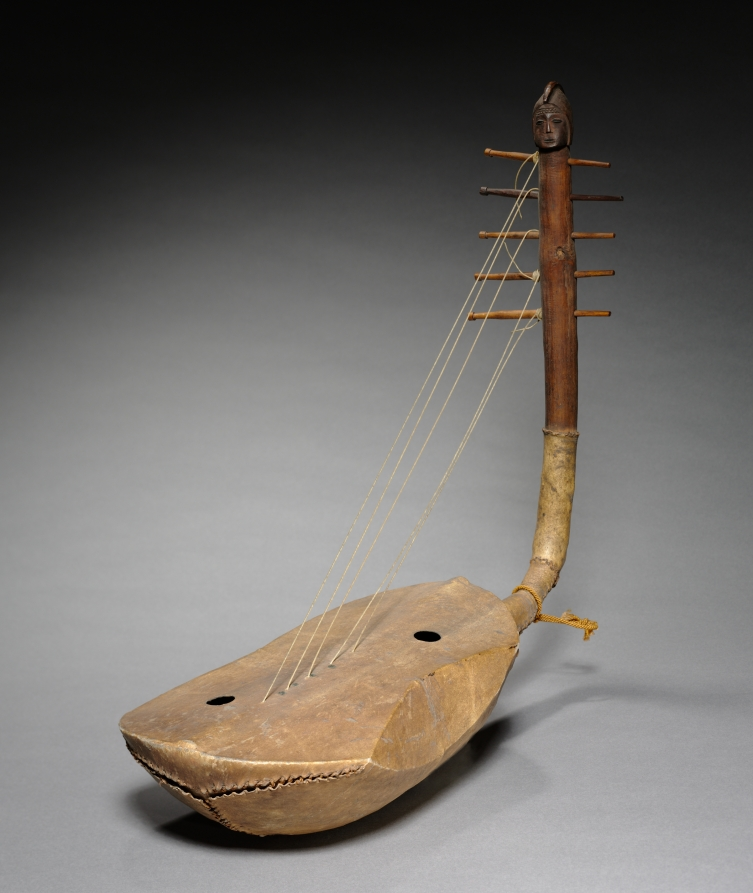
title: Figurative harp (domu)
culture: Africa, Central Africa, Democratic Republic of Congo, Mangbetu style, unknown maker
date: 1900s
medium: Wood, rawhide, and string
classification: Musical Instrument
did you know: Musical instruments like this domu (figurative harp) were among the many decorated utilitarian Mangbetu rulers collected.